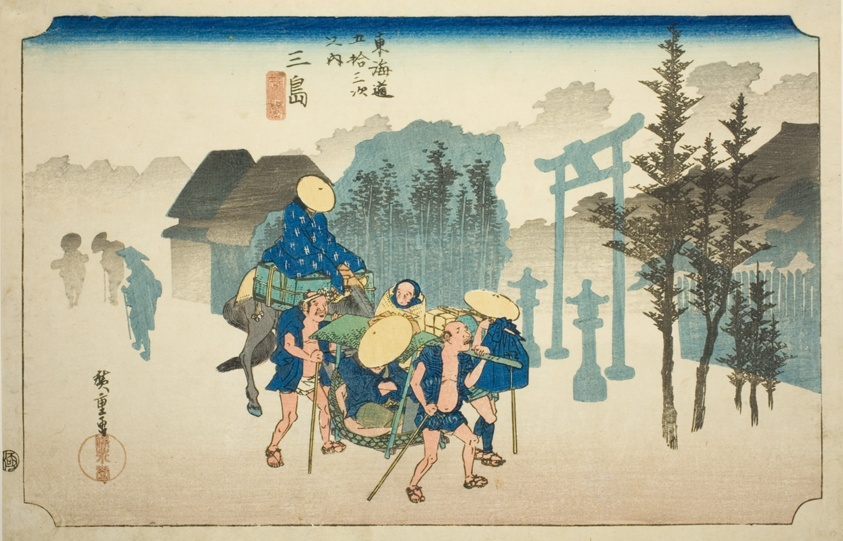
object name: Print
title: Mishima: Morning Mist (Mishima, asagiri), from the series "Fifty-three Stations of the Tokaido Road (Tokaido gojusan tsugi no uchi)," also known as the Hoeido Tokaido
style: Japanese (culture or style)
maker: Utagawa Hiroshige 歌川 広重; Japanese, 1797-1858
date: c. 1833/34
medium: Color woodblock print; oban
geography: Japan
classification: woodblock print; print; asian art